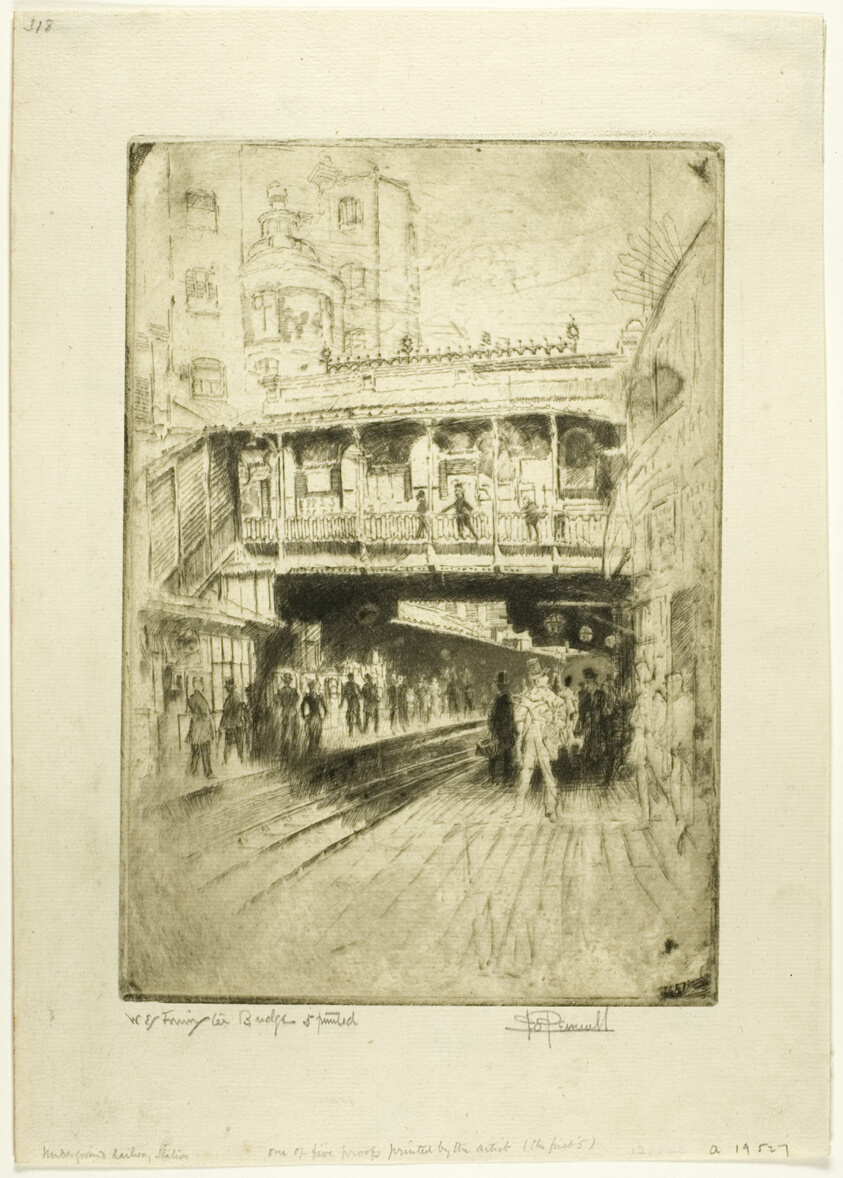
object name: Print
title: Westminster Bridge Station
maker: Joseph Pennell (American, 1857-1926)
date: 1890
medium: Etching on ivory laid paper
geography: United States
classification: etching; print; prints and drawing